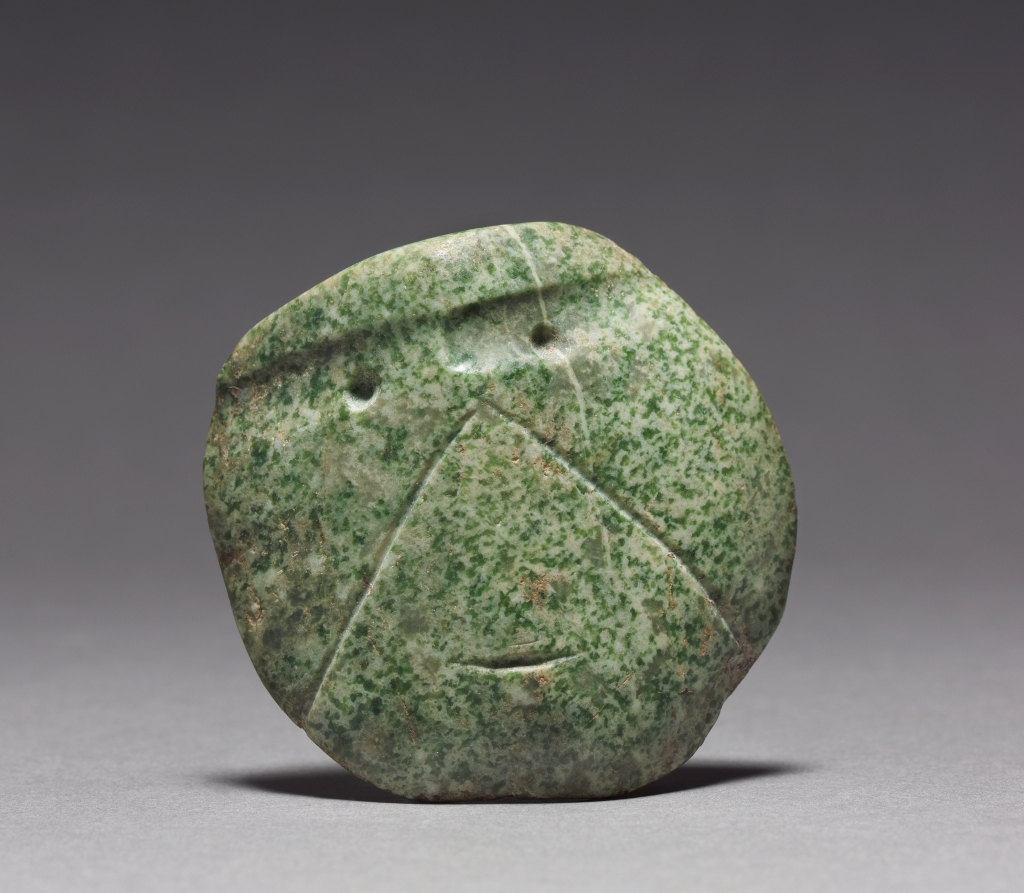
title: Head Pendant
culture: Mesoamerica, Mexico, Guerrero, Mezcala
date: 100 BCE–300 CE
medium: polished green stone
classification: Sculpture